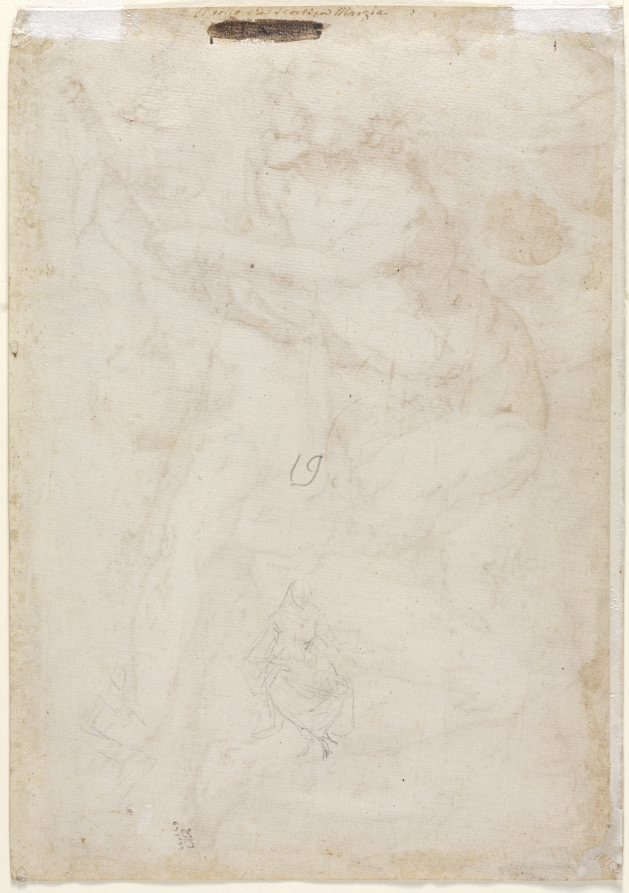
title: Two Sketches of a Mother and Child (verso)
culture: Germany (or Netherlands), 16th century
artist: Anonymous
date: 1500s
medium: graphite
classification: Drawing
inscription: upper center, in brown ink: Apollo chi scortica Marzia ; center, in graphite: 19